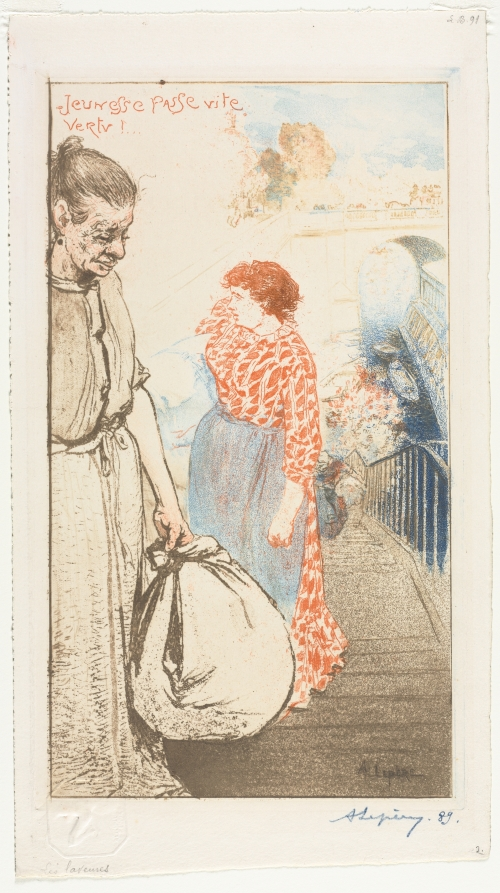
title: Washerwomen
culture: France, 19th century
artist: Auguste Louis Lepère (French, 1849–1918)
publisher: Andre Marty (French, b. 1857)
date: 1893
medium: color softground etching and aquatint with etching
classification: Print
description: Here, Auguste Lepère presented a pair of laundresses ascending steps from a wash boat on the Seine River, where they could pay to clean the loads they had collected. A receptacle for various types of waste, the river was a source of public concern for the unsanitary environment in which laundry was done. Lepère evoked these difficult working conditions by juxtaposing a youthful laundress with one who has spent time in the industry. The figures’ mirrored poses and their contrasting bold and muted tones suggest the passage of time as they carry out their work—a message emphasized by the artist’s caption at upper left: “Youth passes quickly. Virtue!”